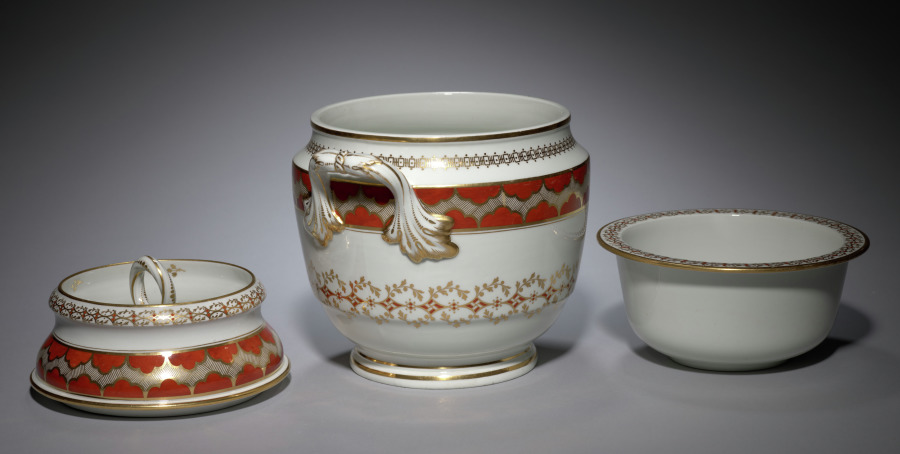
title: Ice Pail (1 of 2)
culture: England, late 18th-early 19th Century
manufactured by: Flight & Barr (British)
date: 1793–1807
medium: porcelain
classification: Ceramic